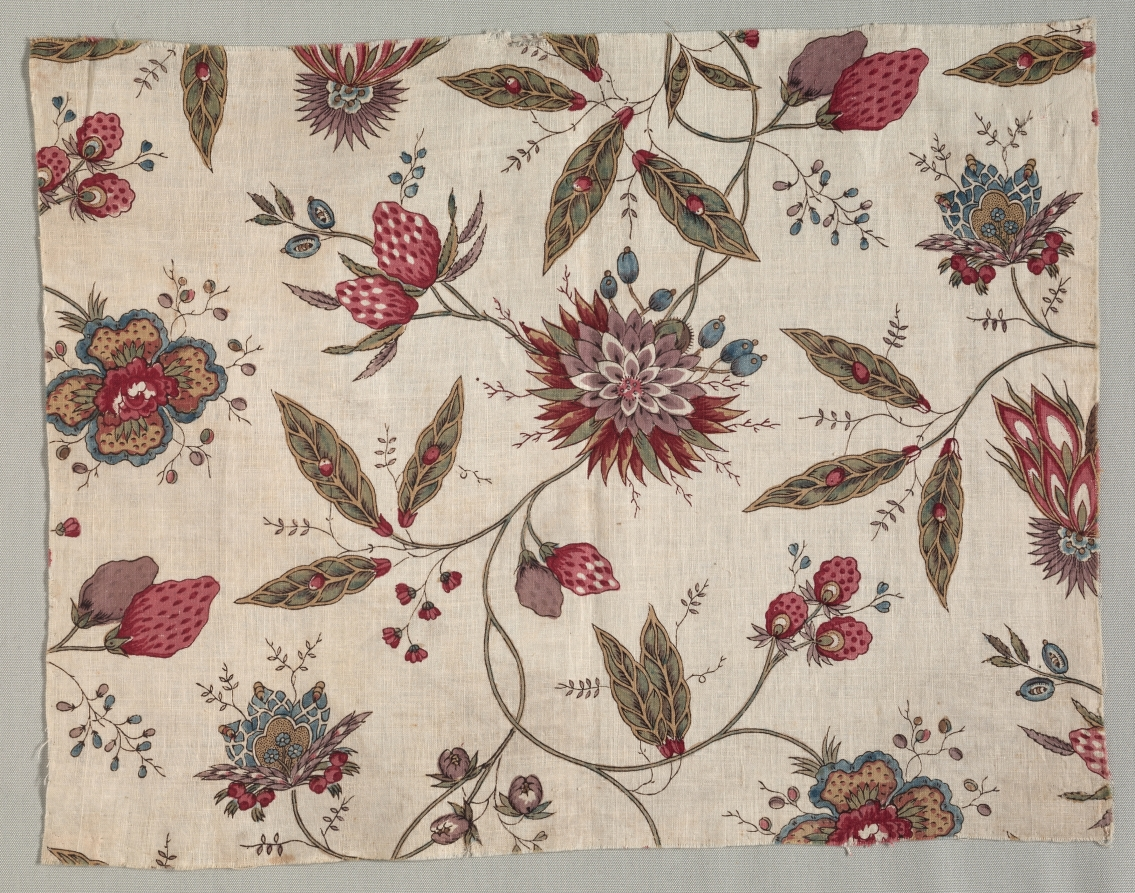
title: Fragment of Block Printed Cotton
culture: France, late 18th century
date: c. 1785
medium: woodblock print on cotton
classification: Textile